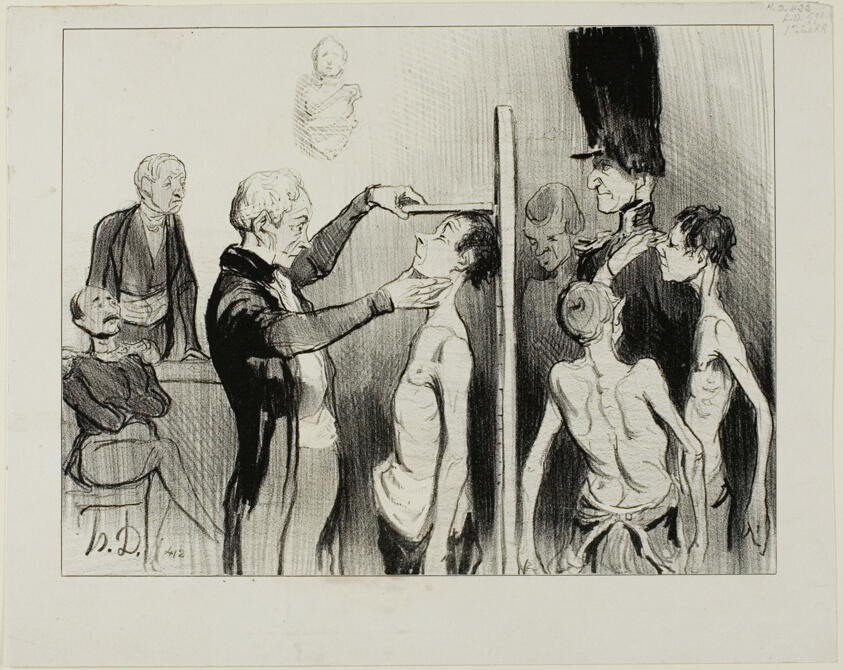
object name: Print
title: The Recruiting Board. “Isn't it a glorious sight: these noble young Frenchmen full of ardour, strength and elegance ready to defend their honour under the flags of Mars,” plate 35 from Caricatures Du Jour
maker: Honoré Victorin Daumier; French, 1808-1879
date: 1842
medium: Lithograph in black on white wove paper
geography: France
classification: lithograph; print; prints and drawing